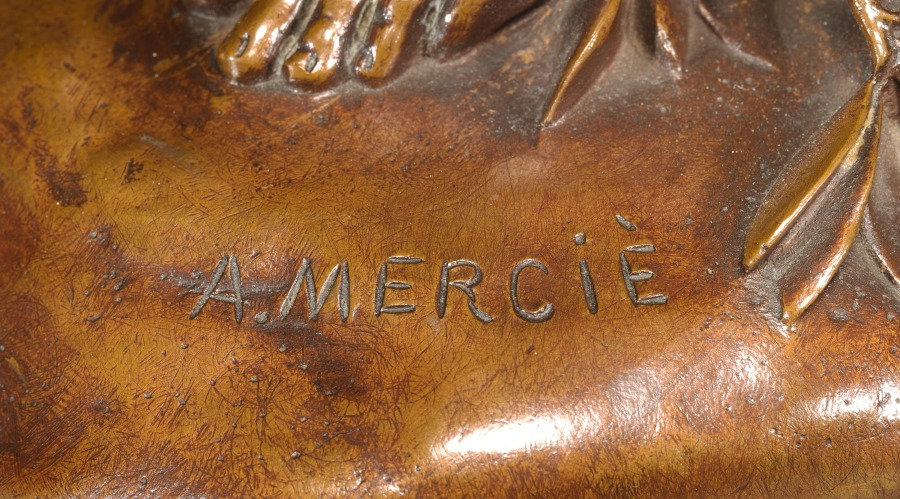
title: Gloria Victis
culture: France, 19th century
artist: Antonin Mercié (French, 1845–1916)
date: c. 1880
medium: bronze with gilding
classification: Sculpture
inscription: Signed near foot at right: "A. MERCIE."; inscribed rear: "F. BARBEDIENNE. FONDEUR."; inscribed front of base: "GLORIA VICTIS."